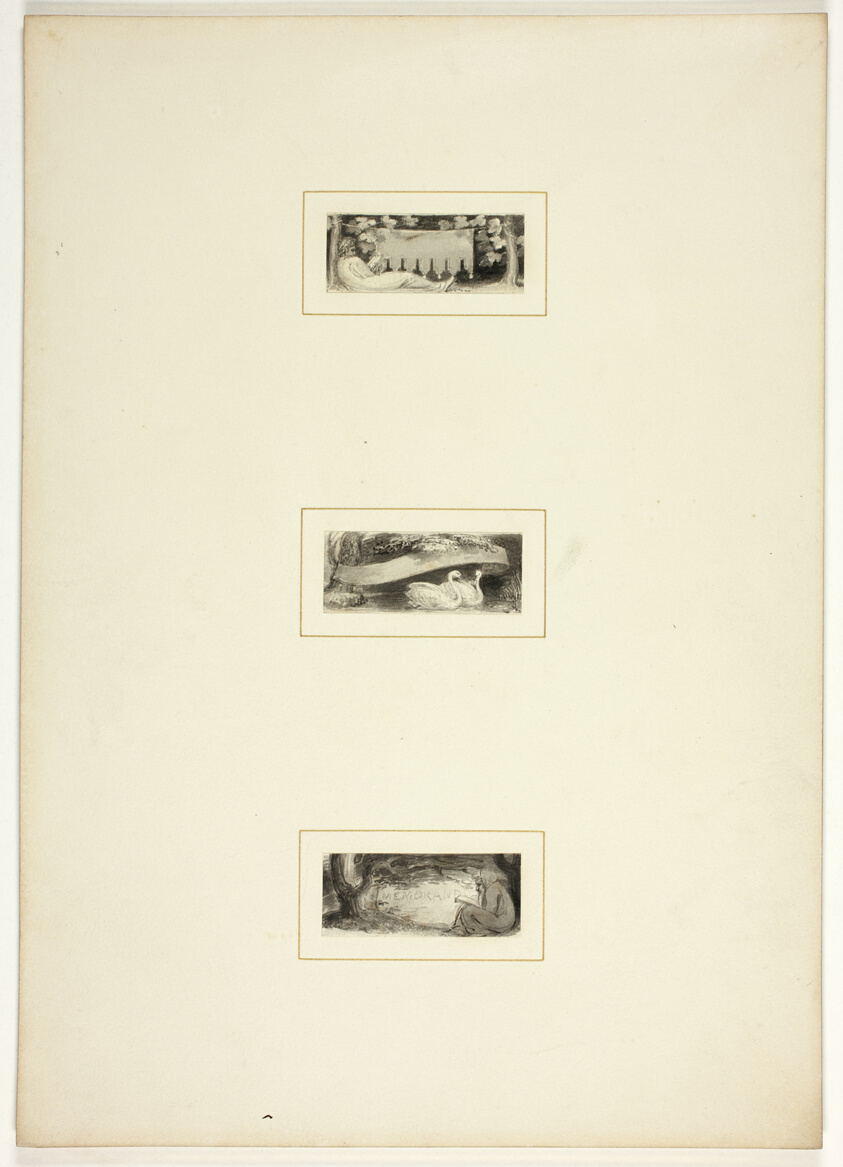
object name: Drawing and Watercolor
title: Study for a plate from Telemachus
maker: Thomas Stothard (English, 1755-1834)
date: c. 1797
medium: Ink wash on paper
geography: England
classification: ink and wash; prints and drawing; paper; drawings (visual works)